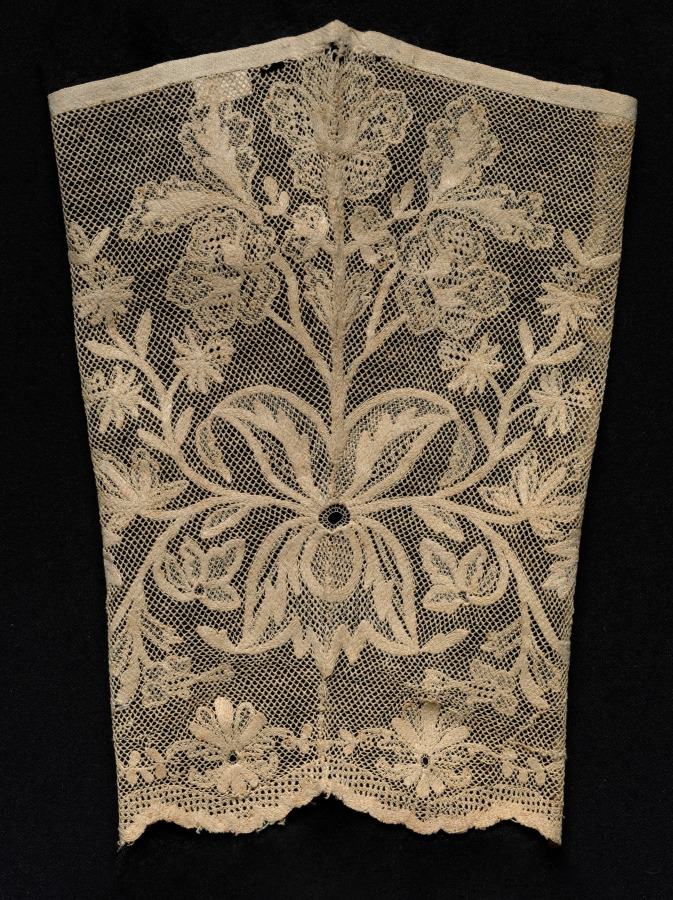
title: Cuff with Floral Vines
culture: Unassigned, 1800s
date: 1800s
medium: Bleached linen (est.): needle lace, filet/lacis (knotted ground and darned in one direction)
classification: Lace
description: In this lace cuff (one of a set, see 1936.226), scrolling vines with budding flowers emerge from a tied bow, creating a stylized bouquet. A scrolling vine with budding vegetation or a tendril motif is a recurring pattern in needle lace. The frequent use of the motif, adapted in lace from different centuries and regions, suggests that it was found in a pattern book.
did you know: From the 15th century, lace cuffs were among the most popular ways to wear and display this costly textile.